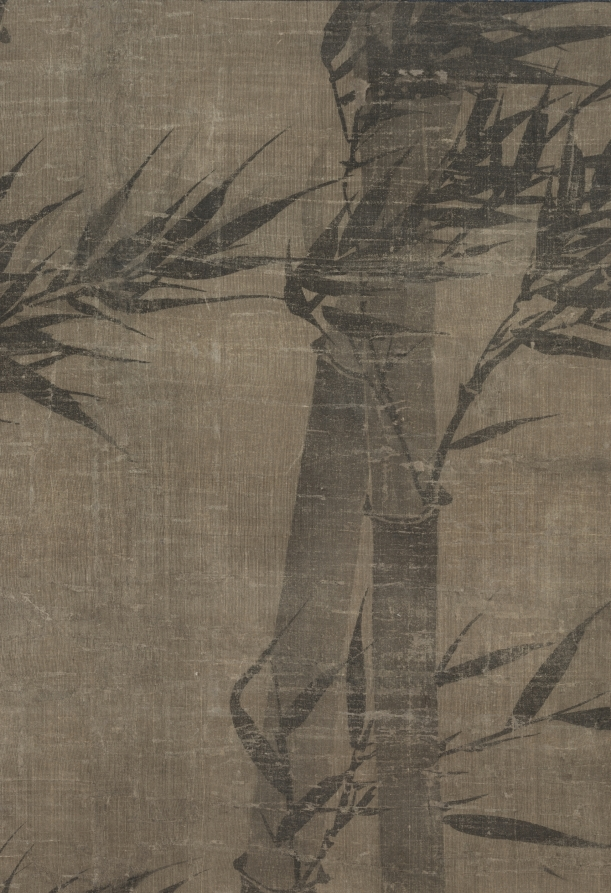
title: Bamboo in Four Seasons: Summer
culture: China, Yuan dynasty (1271-1368)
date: 1279–1368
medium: hanging scroll; ink on silk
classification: Painting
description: The painting depicts high bamboo stems in a breeze with leaves all torn in one direction. The rock on the right suggests a garden setting. Bamboo remains green throughout the year; new shoots emerge every spring and are a Chinese delicacy. During the Yuan dynasty, monochrome ink painting became the dominant style of the scholar-artist, and is used here by a professional painter. Monochrome bamboo with leaves blown in the wind was a popular subject as its depiction demanded brushstrokes and techniques similar to writing calligraphy.